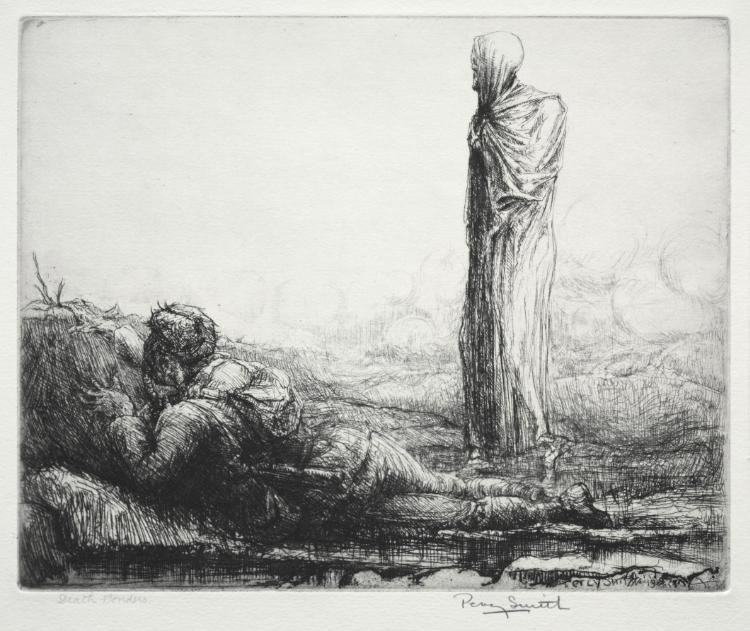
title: Dance of Death: Death Ponders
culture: England, 20th century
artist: Percy John Delf Smith (British, 1882–1948)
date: 1919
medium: etching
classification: Print